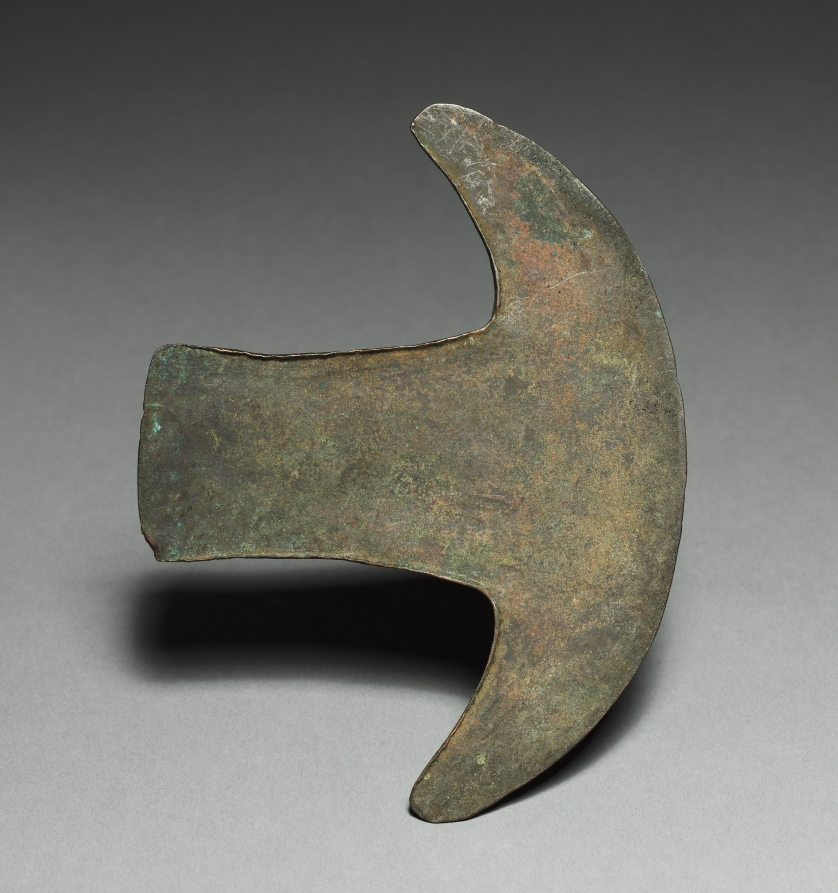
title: Axe-shaped Implement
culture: Mexico, Oaxaca, Mixtec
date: 1200–1519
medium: cast and hammered copper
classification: Metalwork